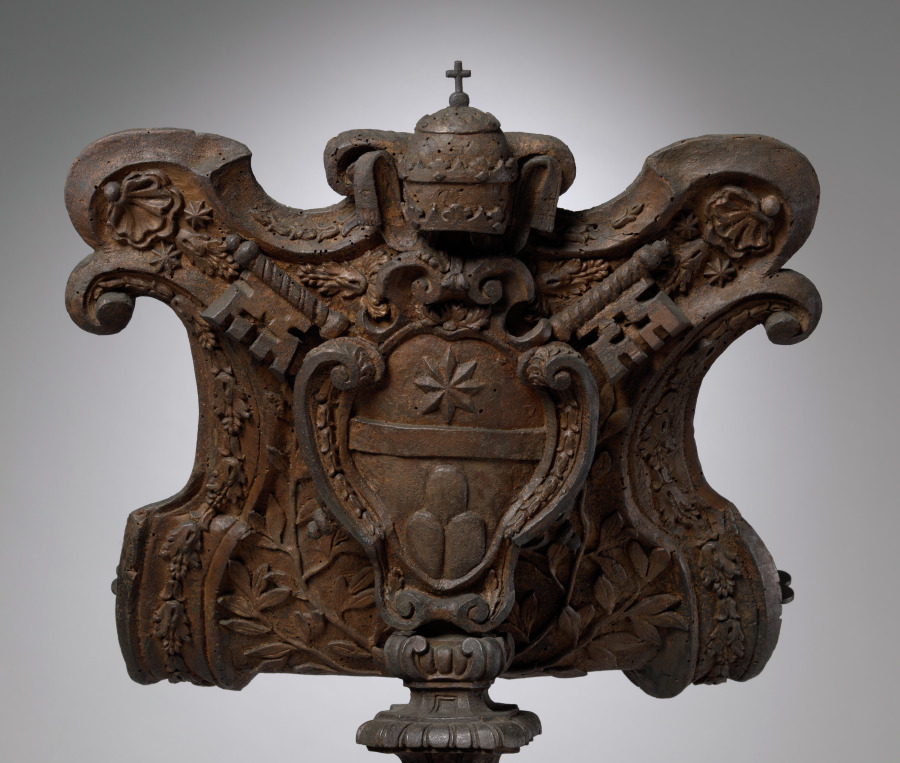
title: Lectern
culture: Italy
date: 1707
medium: wood and gesso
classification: Furniture and woodwork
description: Lecterns of this type were used in Roman Catholic churches and monastery chapels to hold the Bible, from which a priest would read the lessons of scripture and at some points during the liturgy, guide the participants in prayer. The high degree of decoration was achieved by applying plaster gesso to the wooden base allowing for elaborate carving in the same way that a picture frame is worked. Sometimes lecterns bearing the arms of a pope or cardinal like this one were gifts to mark the visit or favor of that official.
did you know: The carved coat of arms on the lectern desk are those of Pope Clement XI, who reigned from 1700 to 1721.